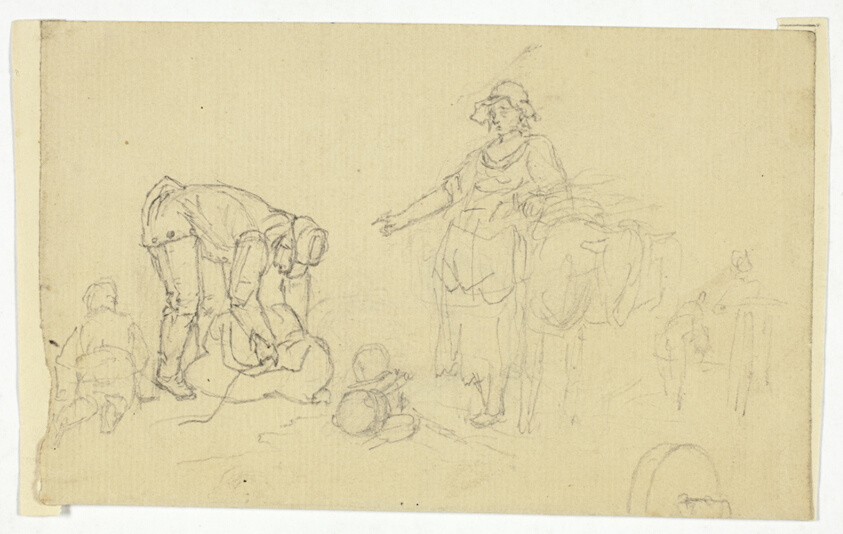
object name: Drawing and Watercolor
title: Peasants with Pack Animal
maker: William Henry Pyne (English, 1769-1843)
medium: Graphite on tan laid paper, tipped onto cream wove paper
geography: England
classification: graphite; drawings (visual works); prints and drawing